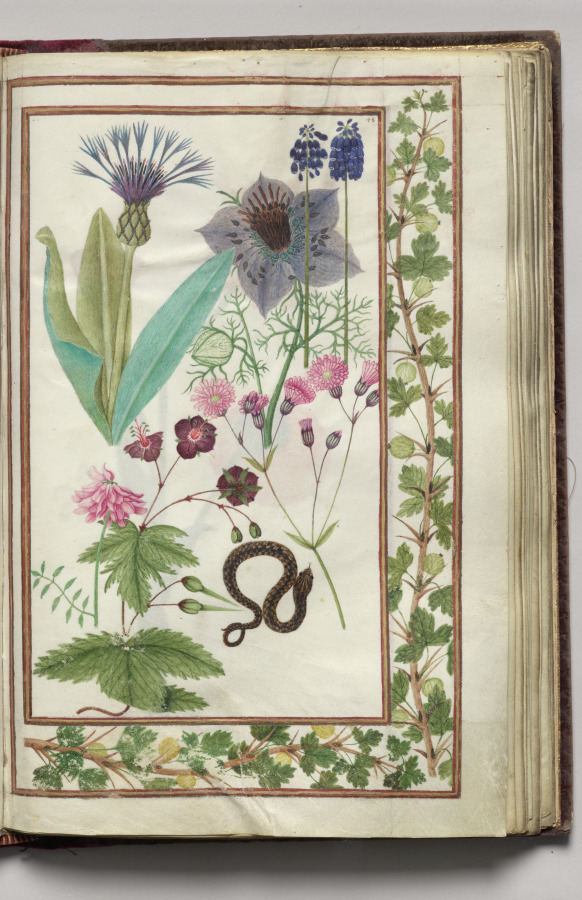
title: Blue Cynthia, Nigella, Gray Pyensin, Cranesbill, and Snake with Gooseberry Border, folio 22 (recto), from Florilegium (A Book of Flower Studies)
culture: France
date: 1608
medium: watercolor, ink, silver, and gold over occasional traces of pencil, on vellum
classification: Bound Volume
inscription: Dated: Poitiers 1608 (on frontispiece) Signed: On frontispiece in black ink, lower right: Van Kuyk Notation on drawing: Frontispiece: in pencil, lower margin: * élève de Van Kessel, peintre flammand (* in pencil also appears in front of Van Kuyk's name).